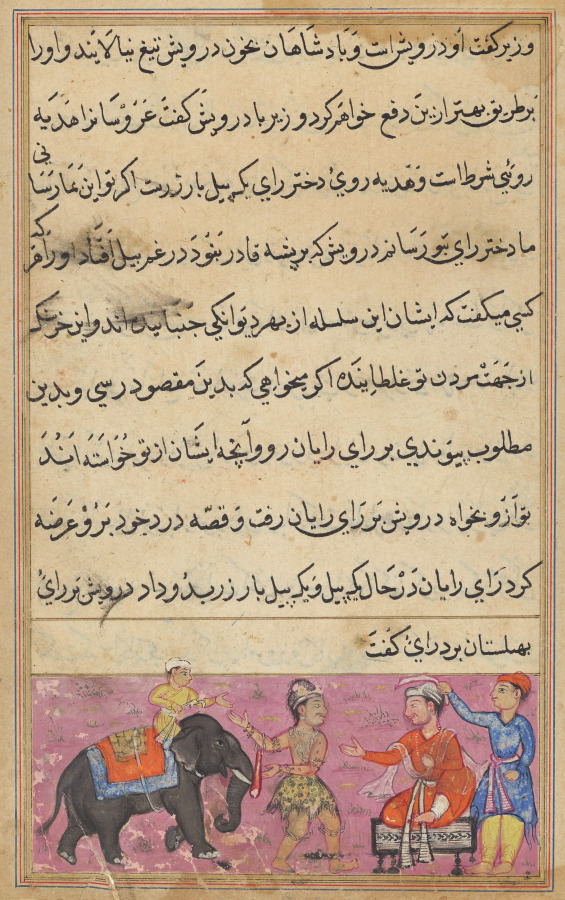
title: The dervish brings in as dowry an elephant laden with gold, from a Tuti-nama (Tales of a Parrot): Seventh Night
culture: Mughal India, court of Akbar (reigned 1556–1605)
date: c. 1560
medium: gum tempera, ink, and gold on paper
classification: Painting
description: The eccentric dervish, wearing a fur cap, a leopard-skin skirt, and chains around his neck, chest, and legs, comes to the king with the very thing the king thought he could never provide: an elephant laden with gold in exchange for the princess’s hand in marriage. The dervish had gone to the magnanimous King of Kings—the overlord of this local king—with his plight: in order to marry the princess, he had to provide an elephant laden with gold as a dowry. The King of Kings, who could not resist a good love story, provided it for him. The text of the story is written in Persian in a naskh script, which is read from right to left.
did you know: This painting is attributed to the same unnamed artist who painted folio 27r (CMA 1962.279.27.a).